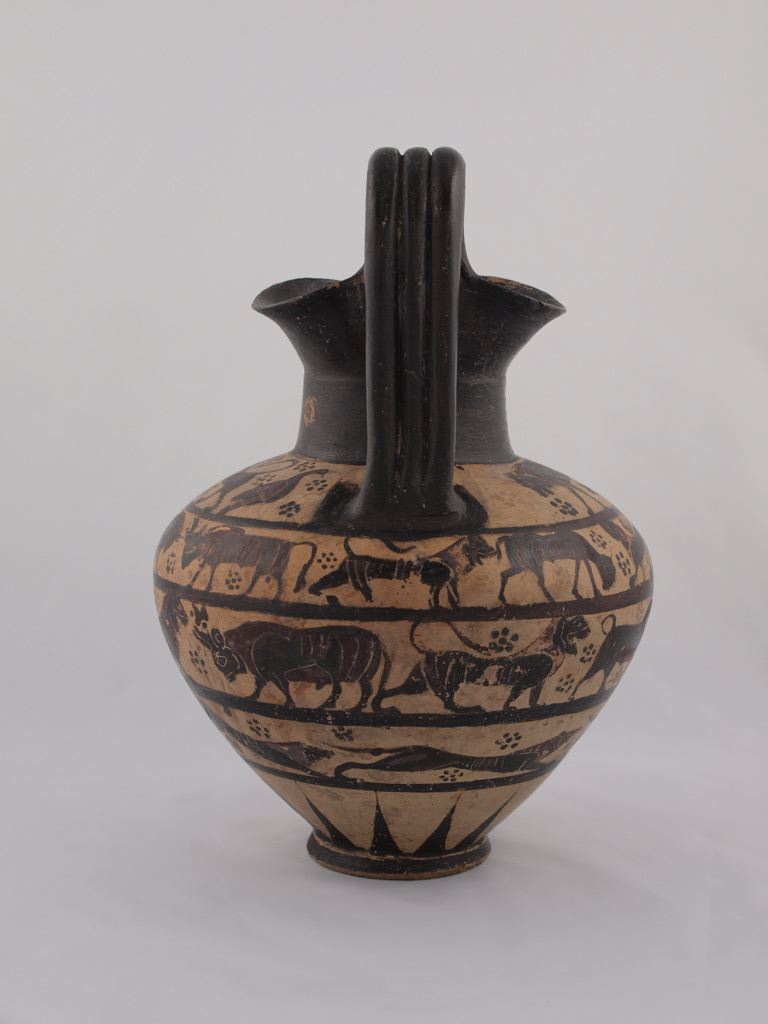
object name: Vessel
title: Oinochoe (Pitcher)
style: corinthian (pottery style), black-figure, ancient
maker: Greek; Corinth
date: 640-625 BCE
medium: terracotta, black-figure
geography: Corinth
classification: pitcher (vessel); earthenware; ceramics; vessel; ancient art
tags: animals, dogs, drinking, bull, lions